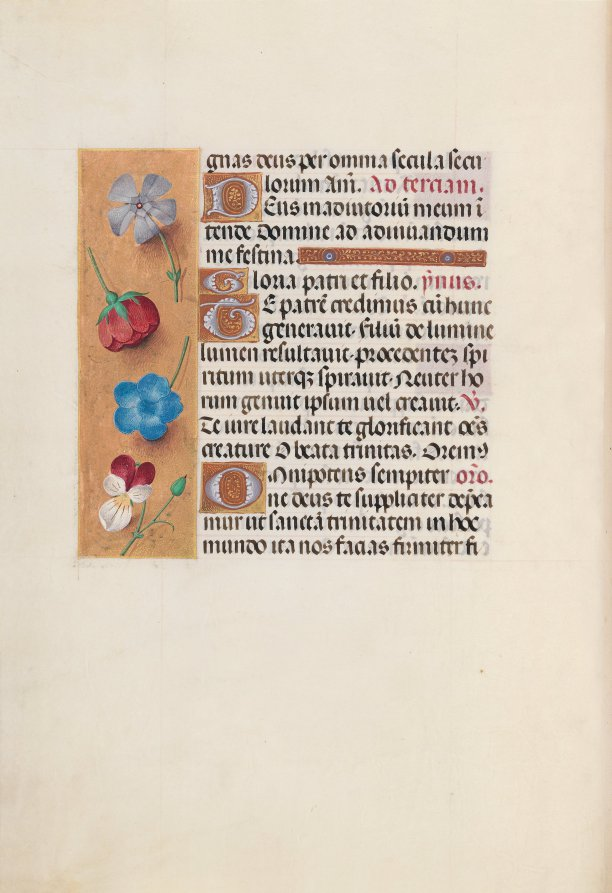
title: Hours of Queen Isabella the Catholic, Queen of Spain: Fol. 19v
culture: Flanders, Ghent and Bruges, late 15th century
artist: Master of the First Prayerbook of Maximillian (Flemish, c. 1444–1519)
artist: and Associates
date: c. 1500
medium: ink, tempera, and gold on vellum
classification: Bound Volume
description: This manuscript was illuminated by a circle of at least five highly organized manuscript painters active in the Flemish cities of Ghent and Bruges. The principal illuminator was Alexander Bening, who painted the majority of the book's miniatures. Manuscripts produced by this circle of artists are renowned for the decoration of their borders, which typically feature a rich variety of realistically-painted flowers, birds, and butterflies. This prayer book, called a book of hours, was intended not for a cleric, but for the private devotions of a lay person-in this case, Isabella the Catholic, Queen of Spain (1451-1504). Isabella's coat of arms embellishes the book's frontispiece. It is unlikely that the book was commissioned by the Queen herself; rather, she probably received it as a diplomatic gift from someone courting her patronage, perhaps Cardinal Francisco Jimenez de Cisneros. A Franciscan friar, Jimenez was dependent upon Isabella for his advancement, first to the post of Queen's confessor in 1492, and then to Archbishop of Toledo in 1495.